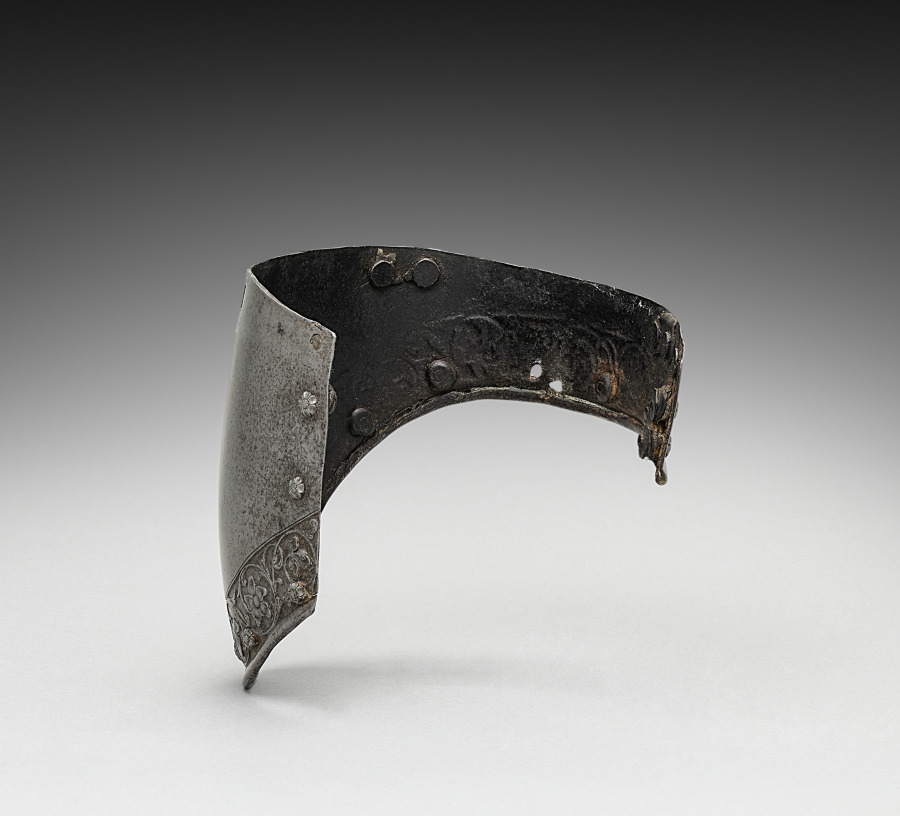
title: Upper Arm Canon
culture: Italy, Milanese Style, probably 19th century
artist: attributed to Negroli Workshop (Italian, c. 1500–1561)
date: 1800s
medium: steel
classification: Arms and Armor